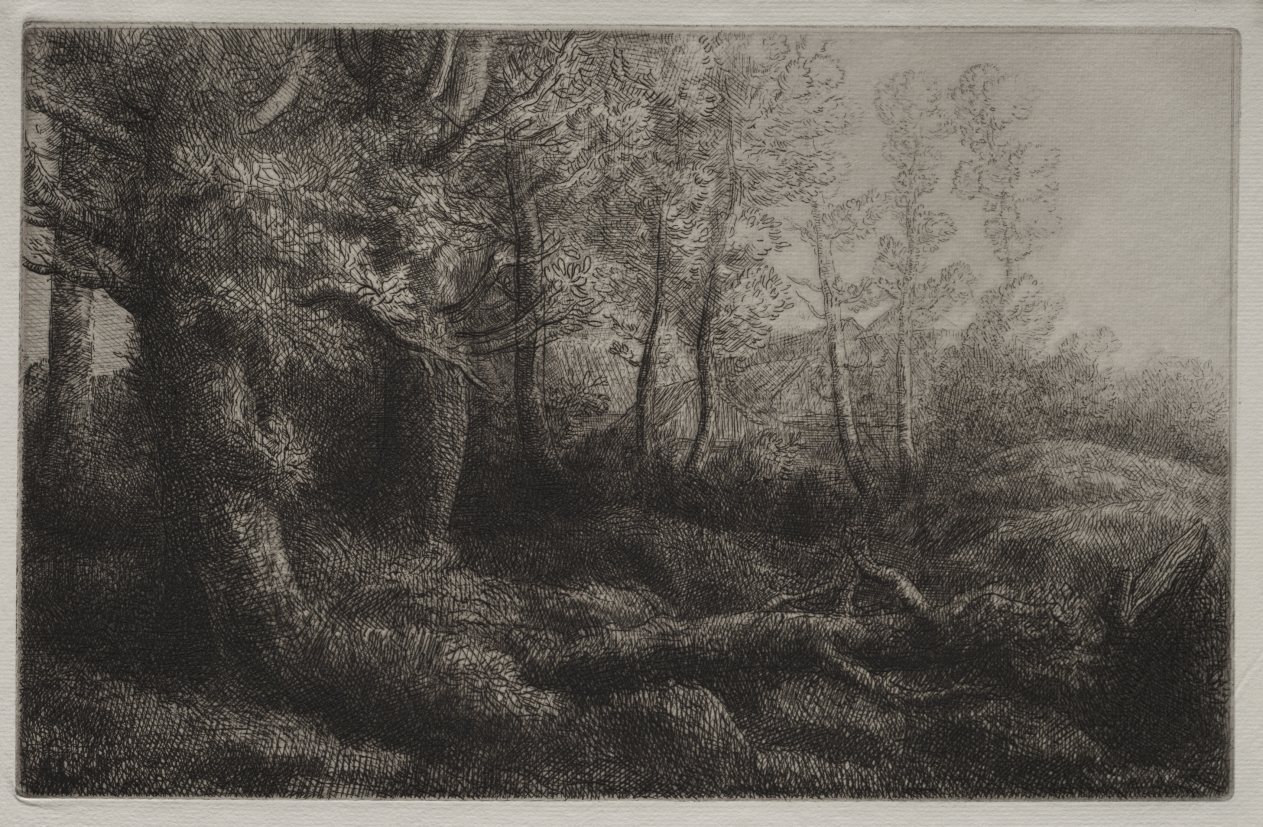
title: A Woodland Study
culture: France, 19th century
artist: Alphonse Legros (French, 1837–1911)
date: c. 1857–1911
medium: etching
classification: Print